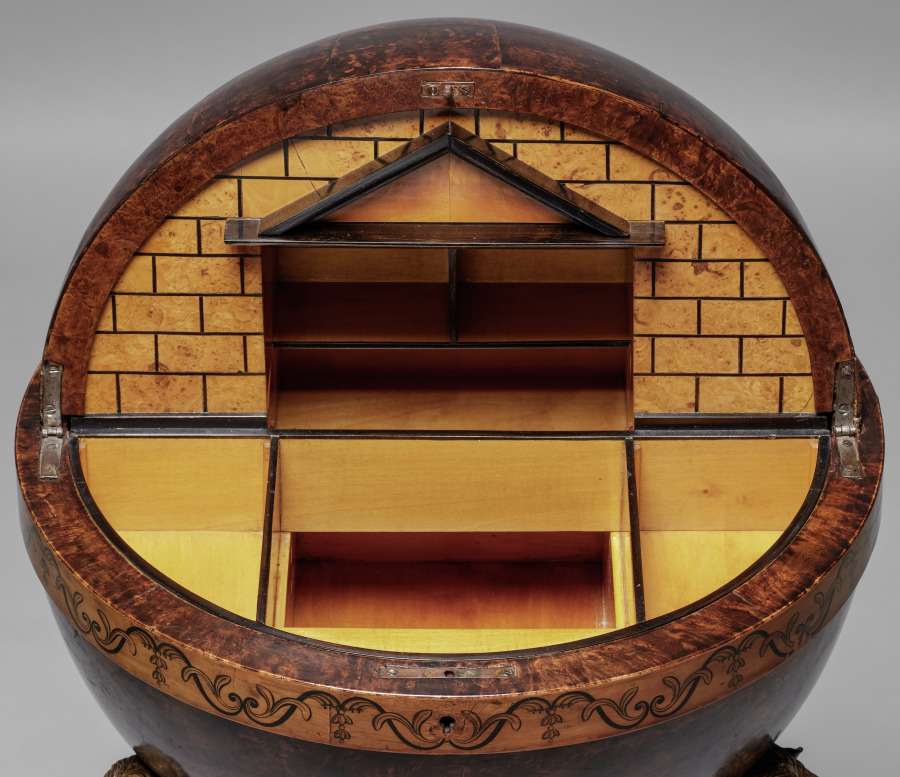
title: Globe Work Table (Globustisch)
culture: Austria, Vienna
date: c. 1810–15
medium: Burl walnut veneer, mahogany, ebony, satinwood, gilt wood, painted wood; mirrored glass; metal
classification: Furniture and woodwork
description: Work tables resembling globes were the usual form for a lady's sewing or writing table around 1800 in Austria. Combining moving parts, secret compartments, and highly finished decoration, these tables were also a way for the cabinetmaker to show off his skill. The tripod supports and temple-like architectural quality of both the exterior and interior decoration reflect the fashionable taste for neoclassical style, or Biedermeier as it was called in Austria, where Vienna was the center of such elaborate furniture production.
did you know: The top half of the globe rotates upward to reveal hidden compartments for sewing tools, threads, and unfinished fabric pieces.